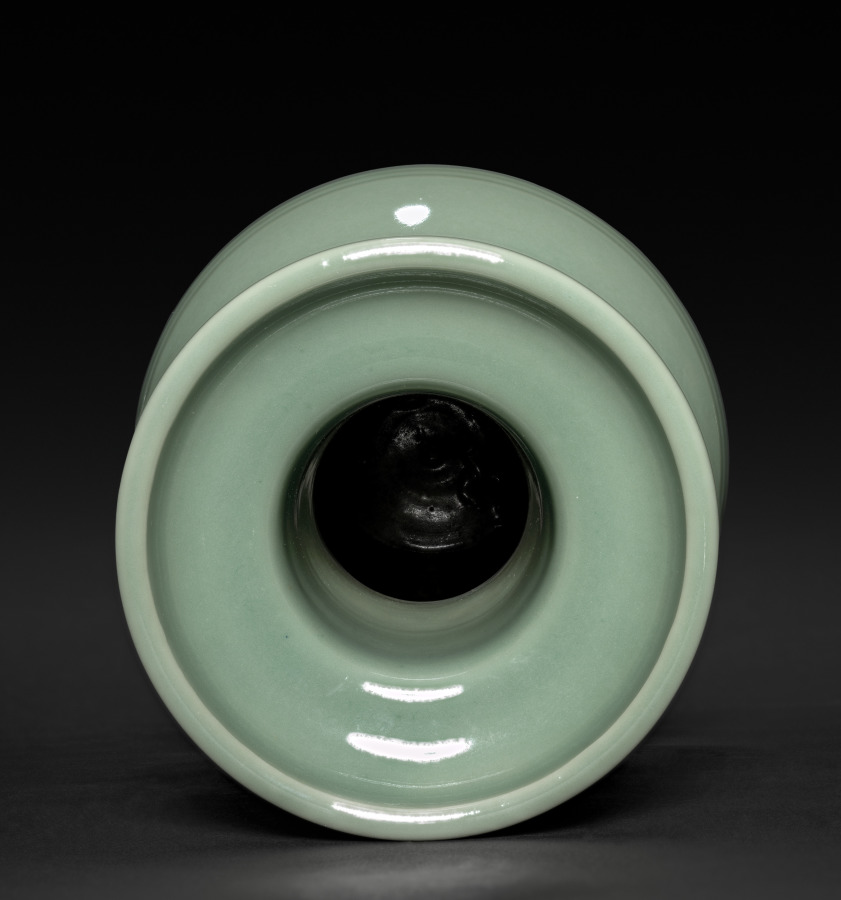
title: Vase with Bamboo Joints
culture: Japan, Taishō period (1912–26)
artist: Seifū Yohei IV (Japanese, 1872–1951)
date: 1914–46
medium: Porcelain with green glaze and molded design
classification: Ceramic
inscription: 清風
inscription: 清風造【印】清風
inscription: 成山清風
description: Yohei IV’s Vase with Bamboo Joints has a shape often seen in pairs of bronze flower vases placed to either side of Buddhist altars before sculptural icons. While the term hisoku (Chinese mise 秘色), or “mysterious color” glazing, indicates a more specific green color than seiji 青磁, a more general word for green-glazed porcelain, there is still some range in the actual color of the glaze.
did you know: Many ceramics created by the Seifū Studio refer to and emulate Chinese ceramics in form and glazing.